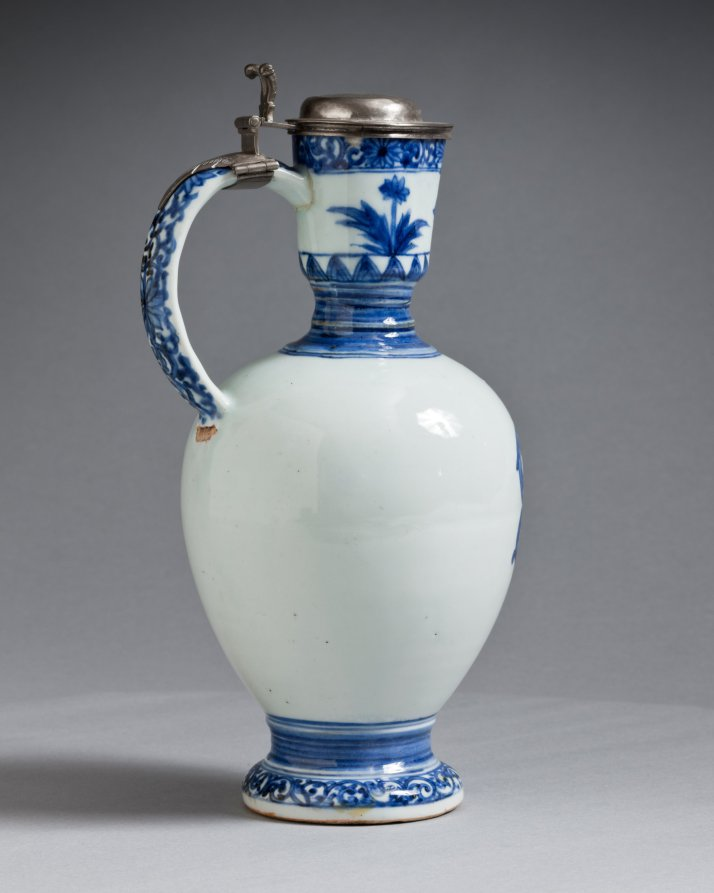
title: Jug with Silver Mounts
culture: Japan, Edo period (1615–1868)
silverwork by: Barent van Leeuwen (Dutch, 1637–1682)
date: c. 1662–76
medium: porcelain with underglaze blue decoration and silver mounts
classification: Ceramic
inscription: [on silver]: town mark for Amsterdam; lion rampant crowned (alloy mark for 0-934 silver); d (date letter for 1666), maker's mark of Barent van Leeuwen.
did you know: The coat of arms on this jug are those of the Valckenier family, active in the Dutch East India Company.